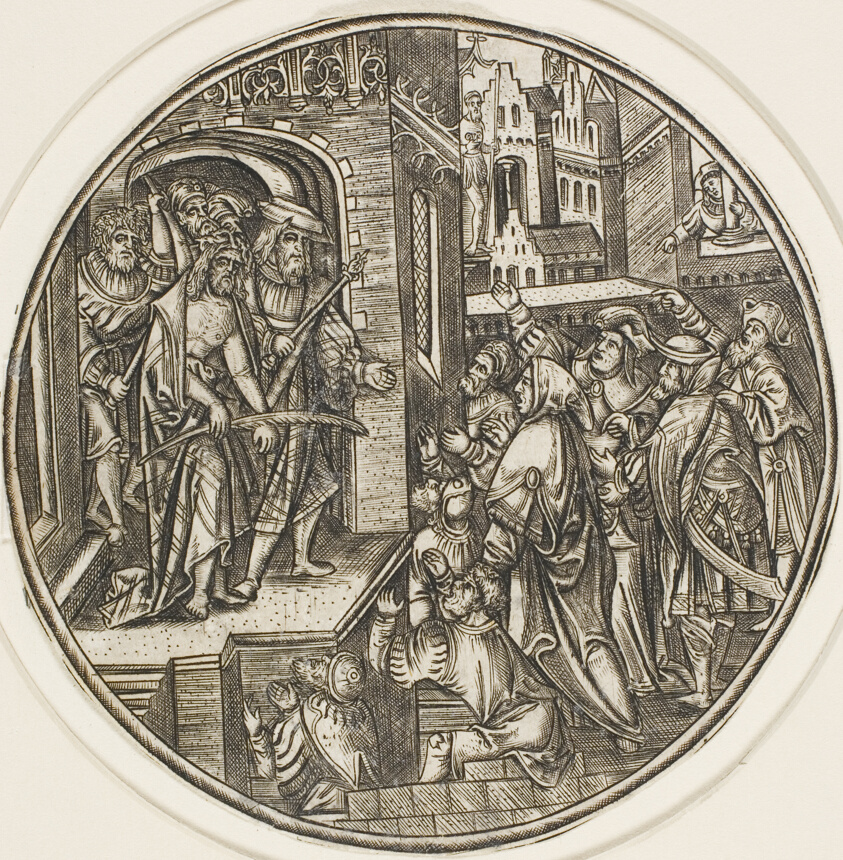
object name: Print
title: Ecce Homo, from The Passion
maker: Master S (Netherlandish, active 1500-1525)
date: 1500/25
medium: Engraving in black on ivory laid paper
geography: Netherlands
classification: engraving; print; prints and drawing